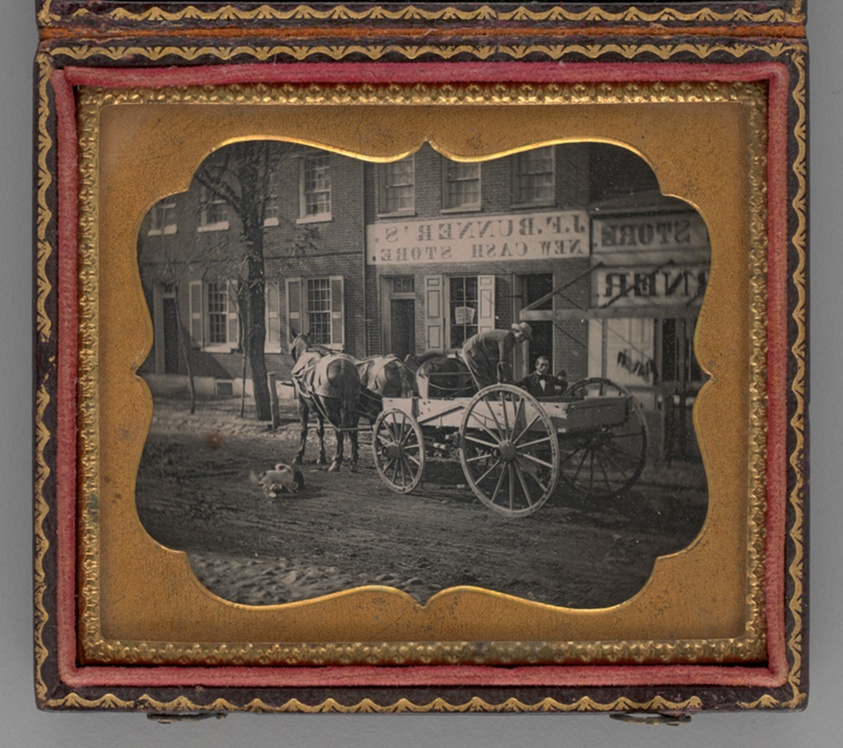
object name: Photograph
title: Untitled (City Scene with Horse-Drawn Carriage)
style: 19th century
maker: Unknown maker; American, 19th century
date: 1853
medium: Daguerreotype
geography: United States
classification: photography; daguerreotype; photograph; photographic process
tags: lundberg collection, cities, city, city scenes, horse-drawn carriage, horses, people, urban life